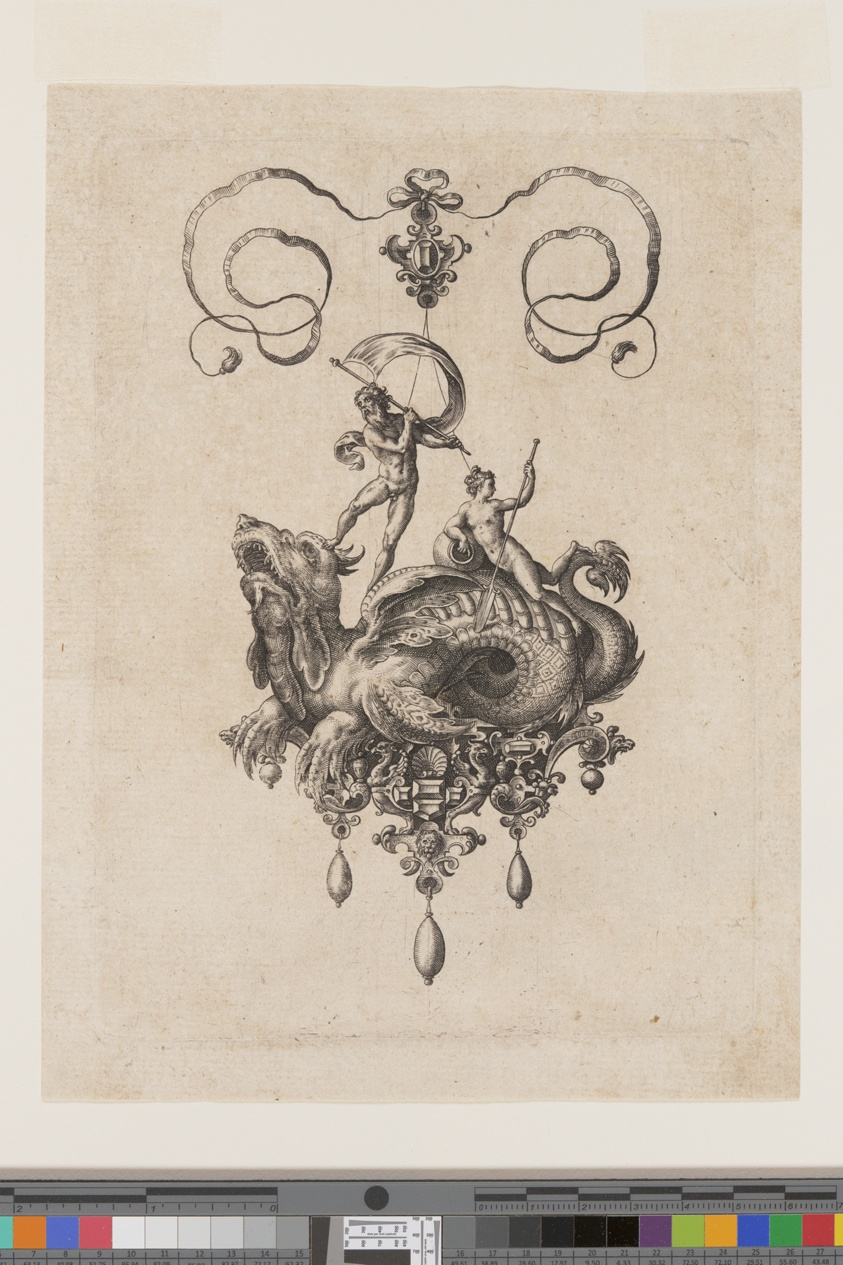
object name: Print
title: Designs for Pendants with Sea Monsters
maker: Adriaen Collaert (Flemish, c. 1560–1618); after Hans Collaert (Flemish, c. 1530–1581)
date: 1582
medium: Engraving on ivory laid paper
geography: Flanders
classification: engraving; paper; print; prints and drawing